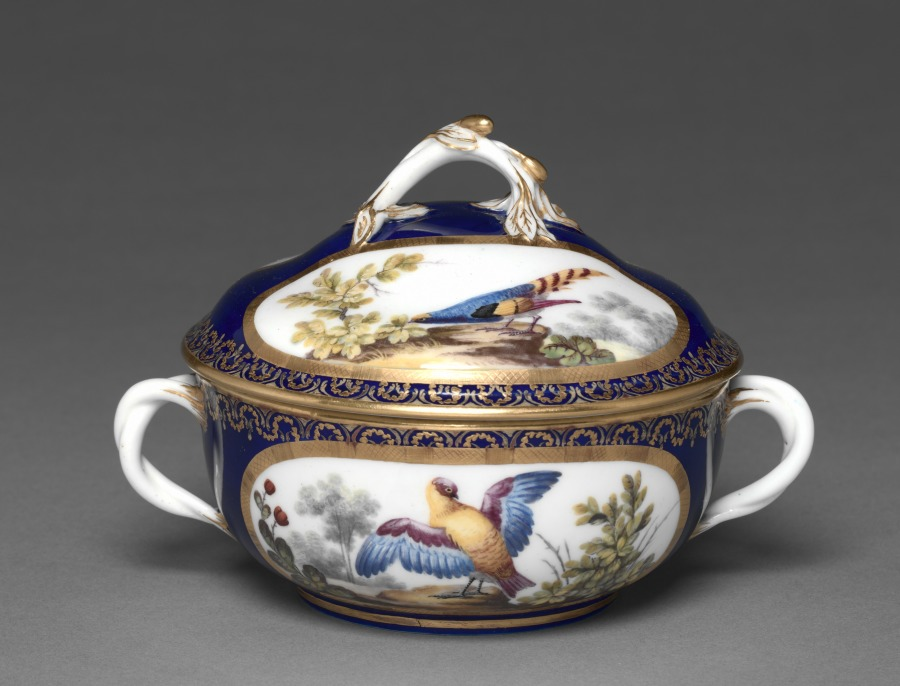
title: Covered Broth Bowl and Stand (Écuelle ronde et plateau ovale)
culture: France, Sèvres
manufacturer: Sèvres Porcelain Factory (French, est. 1756)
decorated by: François-Joseph Aloncle (French)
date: 1772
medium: soft-paste porcelain with enamel and gilt decoration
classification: Ceramic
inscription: Interlaced Ls with date letter 'T'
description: Birds were collected in all forms during the 18th century following an increased European interest in natural history. The birds on this bowl and stand were painted by François-Joseph Aloncle, one of the Sèvres porcelain factory’s principal bird painters. Small, two handled bowls like this one would hold broths or soups consumed by an individual during the toilette, a ritual of washing and dressing practiced by the 18th-century French elite.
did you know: Two different colors of gold decorate these objects’ borders, exemplifying more complex forms of gilding introduced in the 1770s.